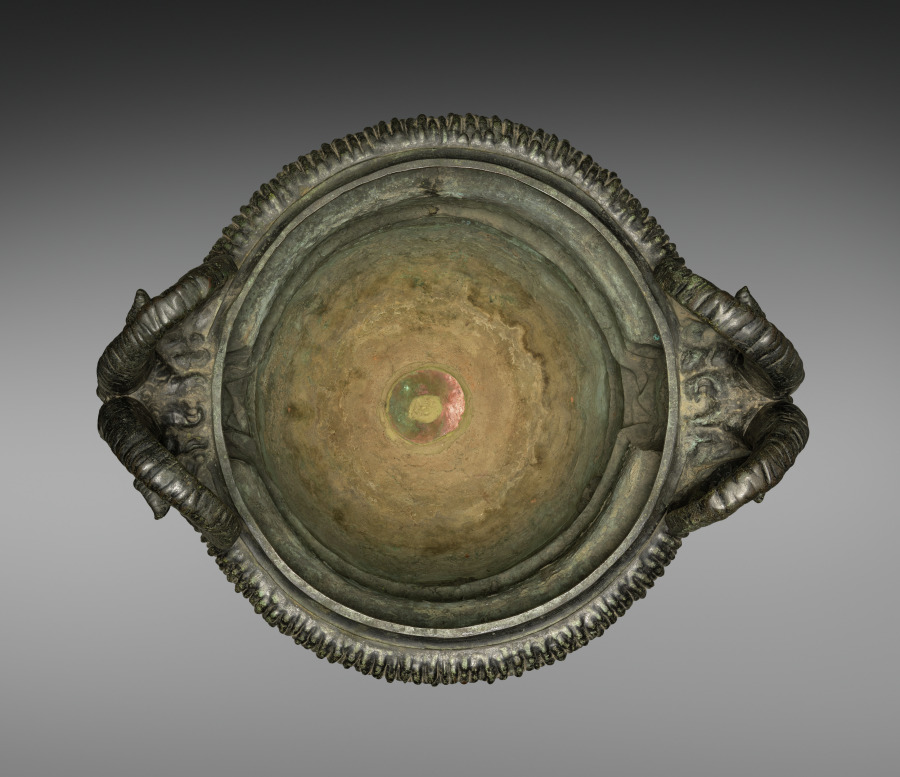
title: Urn with Satyr Heads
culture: France, 18th century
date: 1700s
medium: bronze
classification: Metalwork